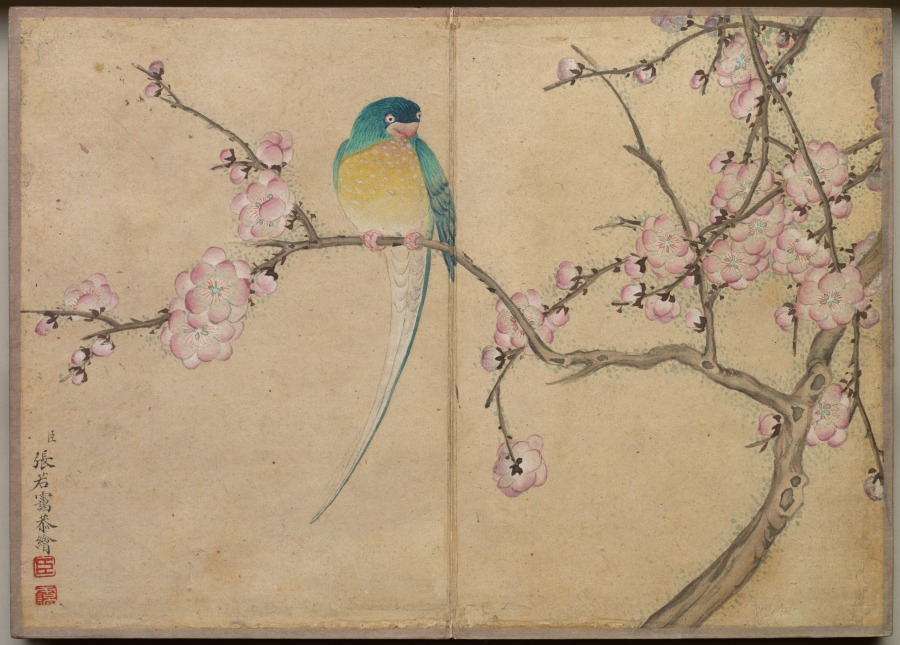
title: Desk Album: Flower and Bird Paintings (Bird with Plum Blossoms)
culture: China, Qing dynasty (1644-1911)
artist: Zhang Ruoai (Chinese, 1713–1746)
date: 1700s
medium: album leaf, ink and color on paper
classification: Painting